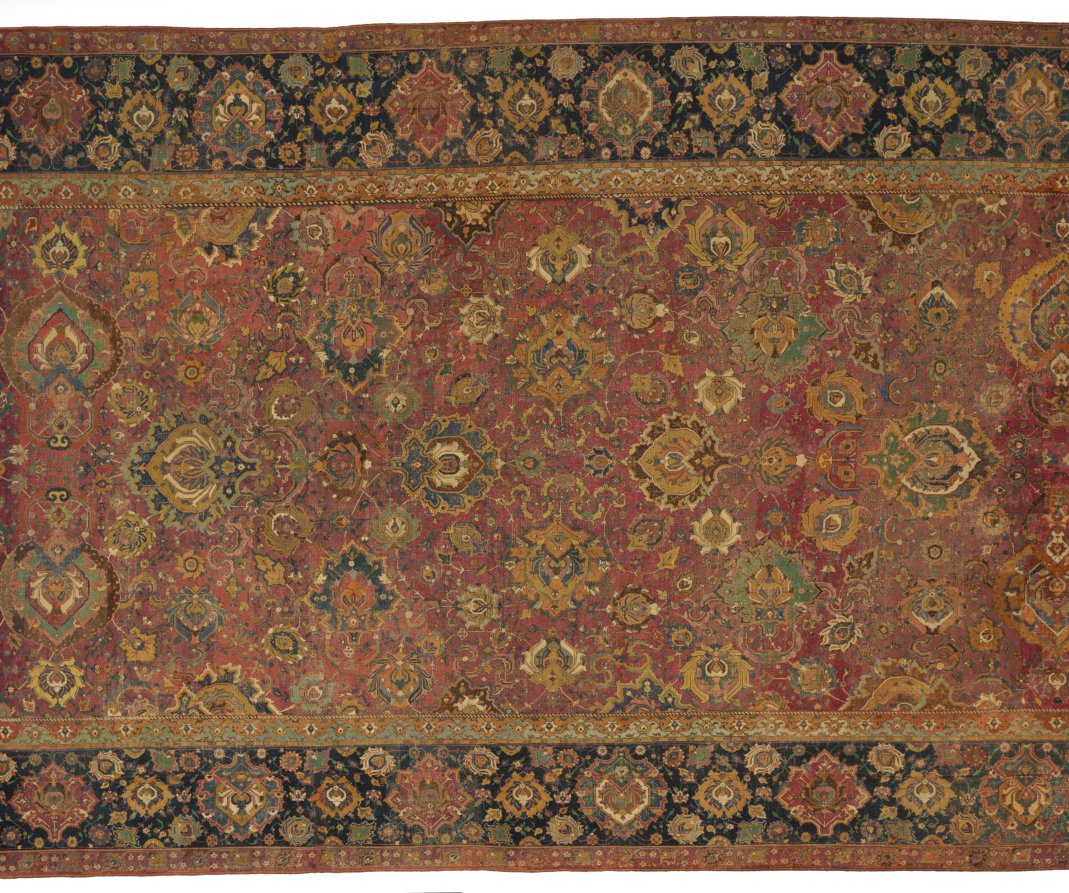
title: Carpet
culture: Iran, Herat, 16th century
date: 1500s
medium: senna knot: wool and cotton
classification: Carpet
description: The Mughals, with their nomadic Central Asian roots, were constantly on the move. They were adept at transporting the trappings of their residences and bases of operation from place to place. Fine carpets and canopies demarcated places of importance, and could be rolled up and moved when the ruler was ready to consolidate his power at a new location. When they settled in stone palaces in India, the interiors were covered with carpets, lending a warmth to the spaces that cannot be felt at the sites today. This carpet is of the type that the Mughals would have acquired for their residences. Mughal paintings are filled with depictions of carpets and textiles, many ornamented, like this one, with delicate and complex palmette-dominated arabesque patterns that evoke a paradisiacal setting.